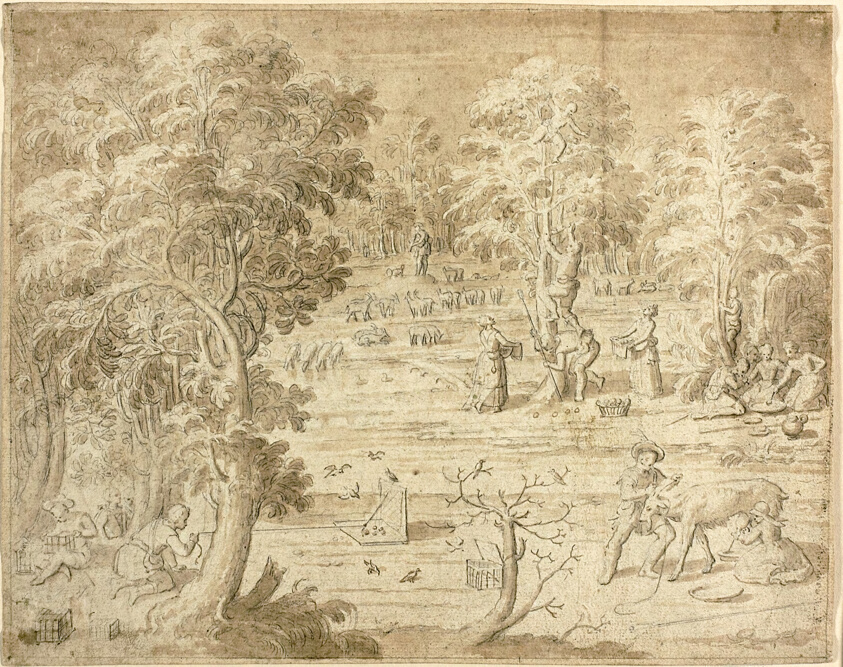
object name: Drawing and Watercolor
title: Youths and Maidens Engaged in Country Pursuits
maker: Antoine Caron (French, c. 1515-1593)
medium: Black chalk and brush and brown wash, with traces of pen and brown ink, on cream laid paper, incised with stylus, and blackened with black chalk on verso for transfer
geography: France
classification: chalk; drawings (visual works); prints and drawing